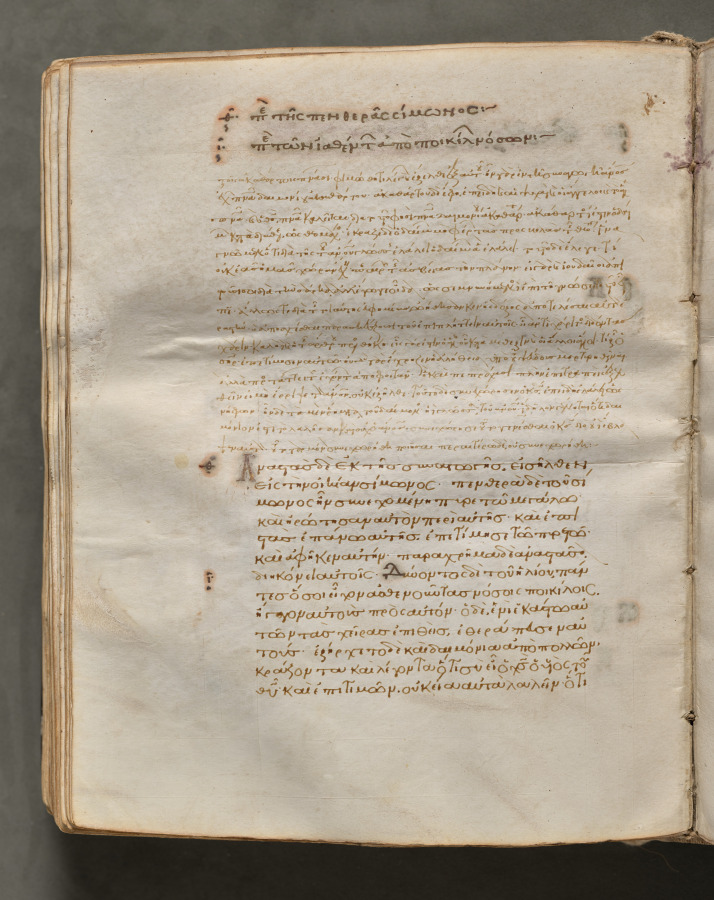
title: Text, folio 221 (verso), from a Gospel Book with Commentaries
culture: Byzantium, Constantinople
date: c. 1000–1100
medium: ink, tempera, and gold on vellum; leather binding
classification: Bound Volume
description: Each of the four gospels in this book opens on a page with brilliantly illuminated borders depicting the author of the text as well as birds-principally peacocks, symbols of the immortality of the soul-and fountains, representing the fountain of life and the salvation of the soul. This volume consists of 428 leaves with texts in Greek. Its level of sophistication suggests that it was probably written and decorated in a monastery in Constantinople.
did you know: Gospel Books were carried in procession through Byzantine churches.